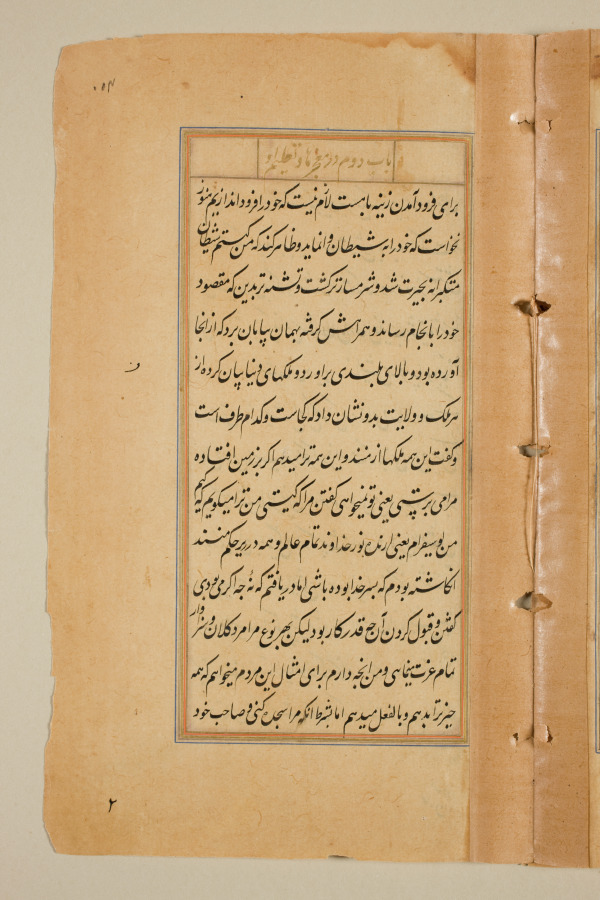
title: Text page from a Mirror of Holiness (Mir’at al-quds) of Father Jerome Xavier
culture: Mughal India, Allahabad, made for Prince Salim (1569–1627)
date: 1602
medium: Ink and gold on paper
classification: Manuscript